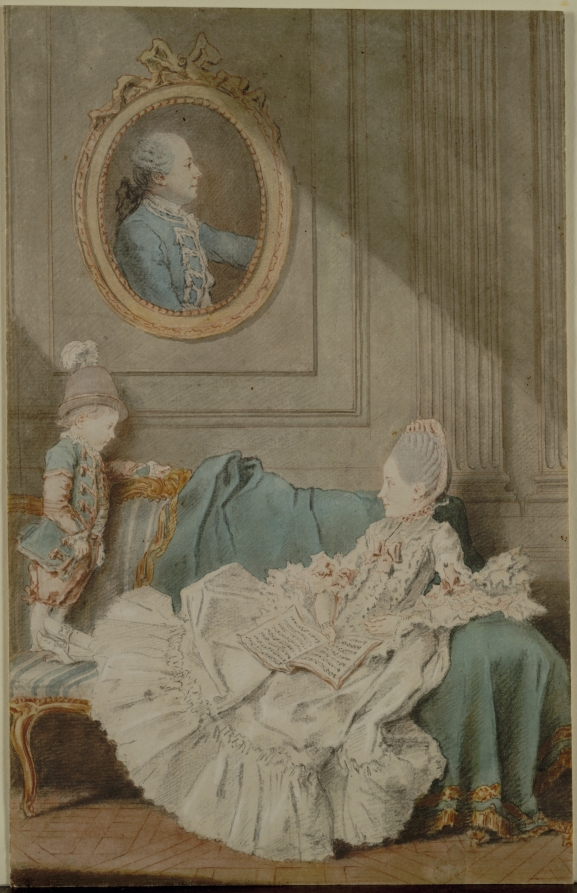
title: Madame Millin du Perreux and Her Son, with a Painted Portrait of Monsieur Jérôme-Robert Millin du Perreux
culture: France, 18th century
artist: Louis Carmontelle (French, 1717–1806)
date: c. 1760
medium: red chalk, black chalk, and watercolor, heightened with white chalk or paint?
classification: Drawing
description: Carmontelle was an amateur artist working in the circle of the Duke of Orléans (at that time, Louis Philippe d'Orléans, great-grandson of Monsieur, the brother of Louis XIV). Hundreds of the artist's drawn portraits survive, most of them similar to this one in format and technique. Carmontelle had an official appointment in the Orléans household as tutor to the Duke's son. Because of this, he met many of the most prominent men and women in France, whom he drew for his own amusement. The family in this drawing is identifiable because of another drawing of them by Carmontelle, now in the Musée Condé, in Chantilly (near Paris).